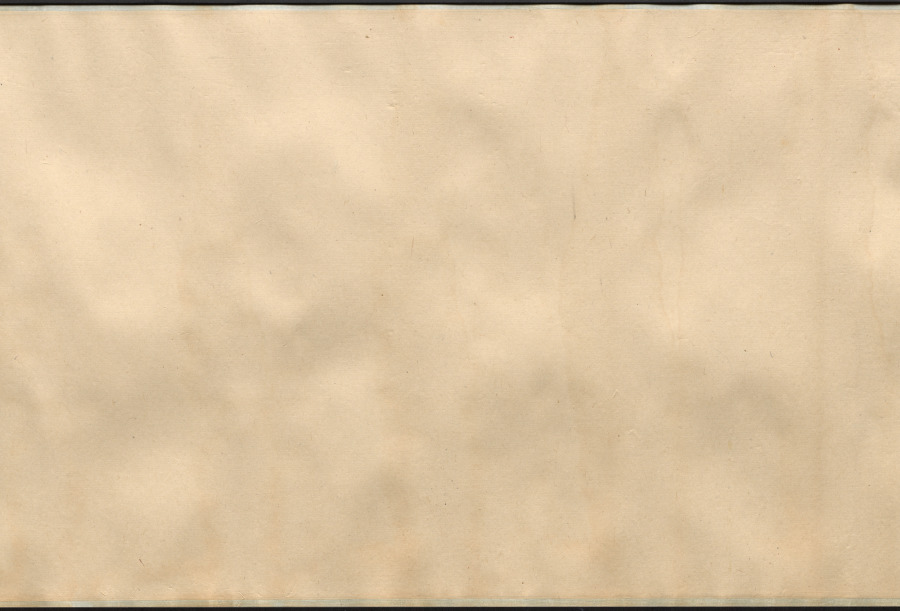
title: Rocks, Orchid, and Bamboo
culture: China, Qing dynasty (1644-1911)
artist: Shitao (Chinese, 1642–1707)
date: 1662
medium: handscroll; ink on paper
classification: Painting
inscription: Title colophon in four characters with signature and two seals on gold-flecked paper.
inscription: Artist's signature, inscription (with date of 1662), five seals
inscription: Colophon with two seals.